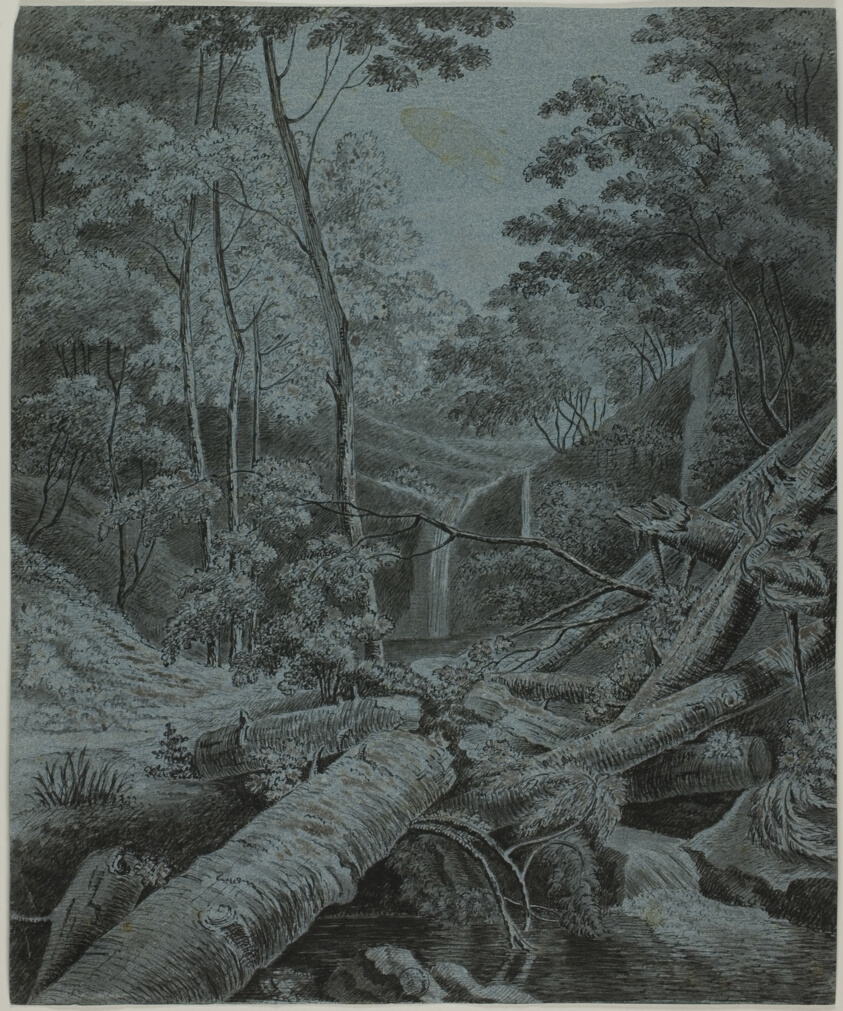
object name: Drawing and Watercolor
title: Waterfall and Fallen Logs in Forest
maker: Unknown Artist; French, 18th century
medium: Pen and black ink, with brown and gray wash, heightened with lead white (discolored), on blue laid paper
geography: France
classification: pen and ink drawings; drawings (visual works); prints and drawing